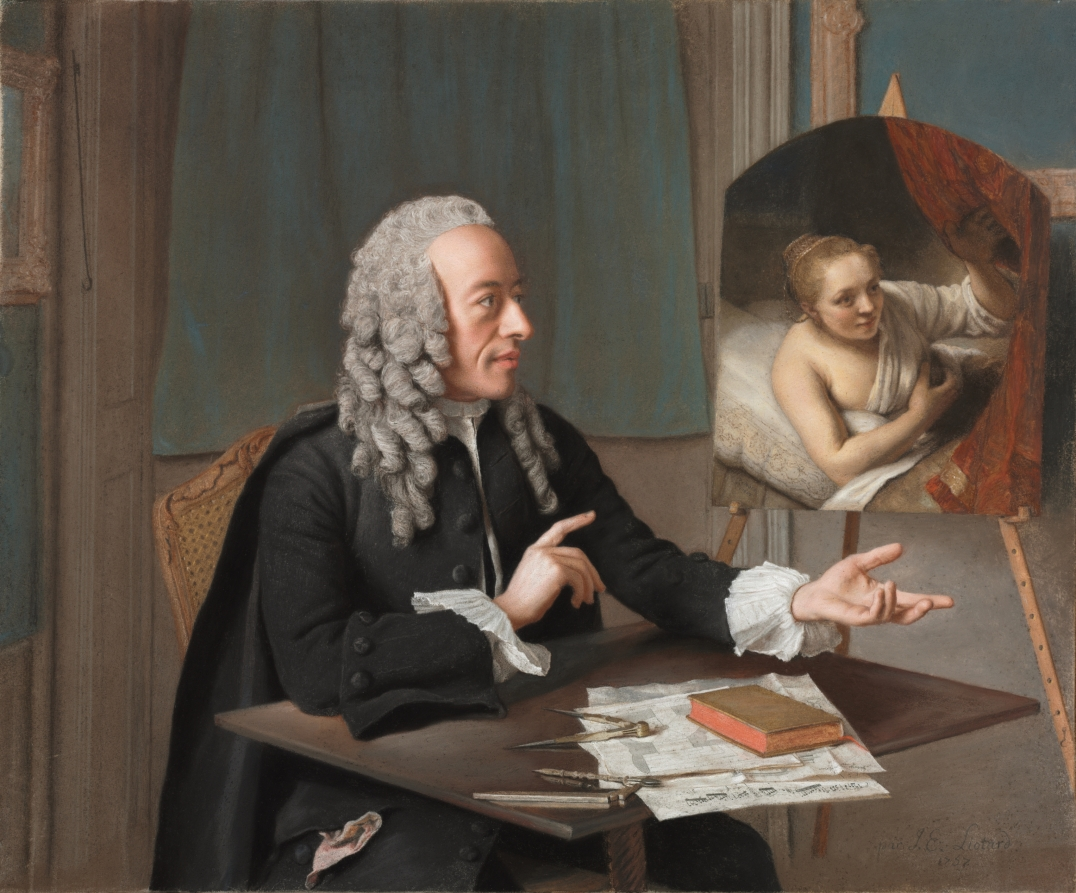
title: François Tronchin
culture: Switzerland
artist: Jean-Etienne Liotard (Swiss, 1702–1789)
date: 1757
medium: pastel on parchment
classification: Drawing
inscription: signed and dated, in black crayon, at lower right: par. J.E. Liotard / 1757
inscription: on verso, in red: TH / 51; mark of the Tronchin family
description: This pastel drawing depicts François Tronchin, a prominent figure in his native Geneva and an impassioned patron of the arts. The table before Tronchin features a book, mathematical instruments, and papers that indicate his interests in architecture and music. Rembrandt's Lady in Bed, a painting that the Dutch master created around 1645 (today in the collection of the Scottish National Gallery) and the most highly prized painting in Tronchin's collection, rests on an easel nearby. Liotard considered the portrait of Tronchin among his finest works, and the meticulous rendering of the sitter's powdered wig, transparent flesh, and lace cuffs suggest the skill he had developed in pastel at this time.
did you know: Jean-Etienne Liotard created portraits of eight other members of the Tronchin family around the same time as this pastel.